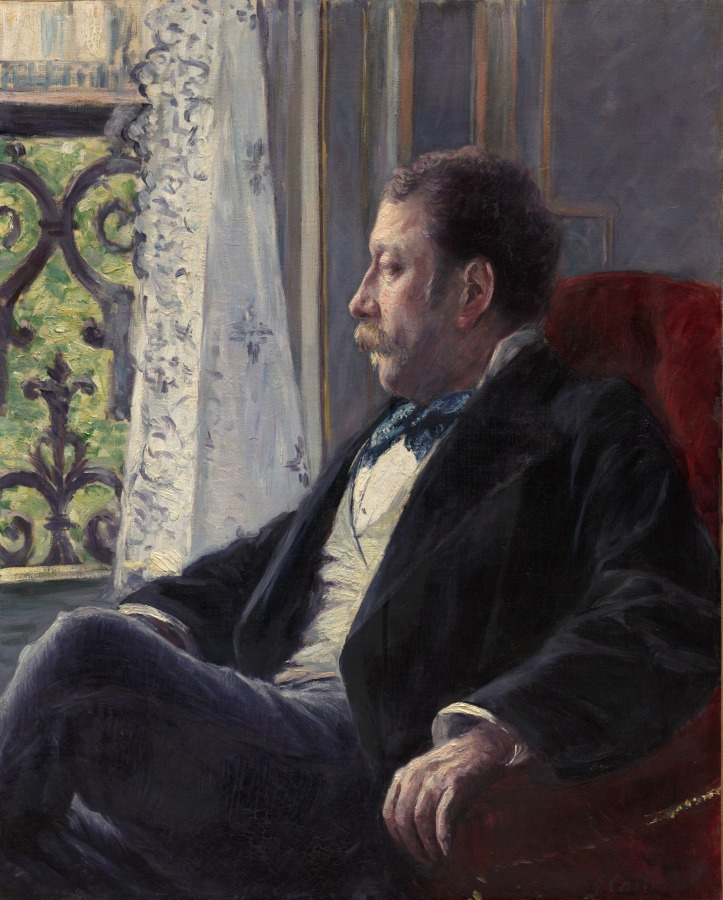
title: Portrait of a Man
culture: France, 19th century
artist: Gustave Caillebotte (French, 1848–1894)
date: 1880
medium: oil on canvas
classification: Painting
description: This portrait of Albert Courtier was painted in the fourth-floor apartment at 31 boulevard Hausmann in Paris that Gustave Caillebotte shared with his brother Martial. The interior and balcony of this apartment provided the setting for numerous paintings of men in Caillebotte’s social circle surveying the city. Courtier’s pose and unguarded gaze suggest a comfortable rapport with the artist. Their relationship was close: Courtier posed for Caillebotte on several occasions, owned four of the artist’s paintings, and designated his friend as godfather to his eldest daughter.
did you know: The subject of this portrait is Albert Courtier, Gustave Caillebotte's notary as well as a lifelong family friend.